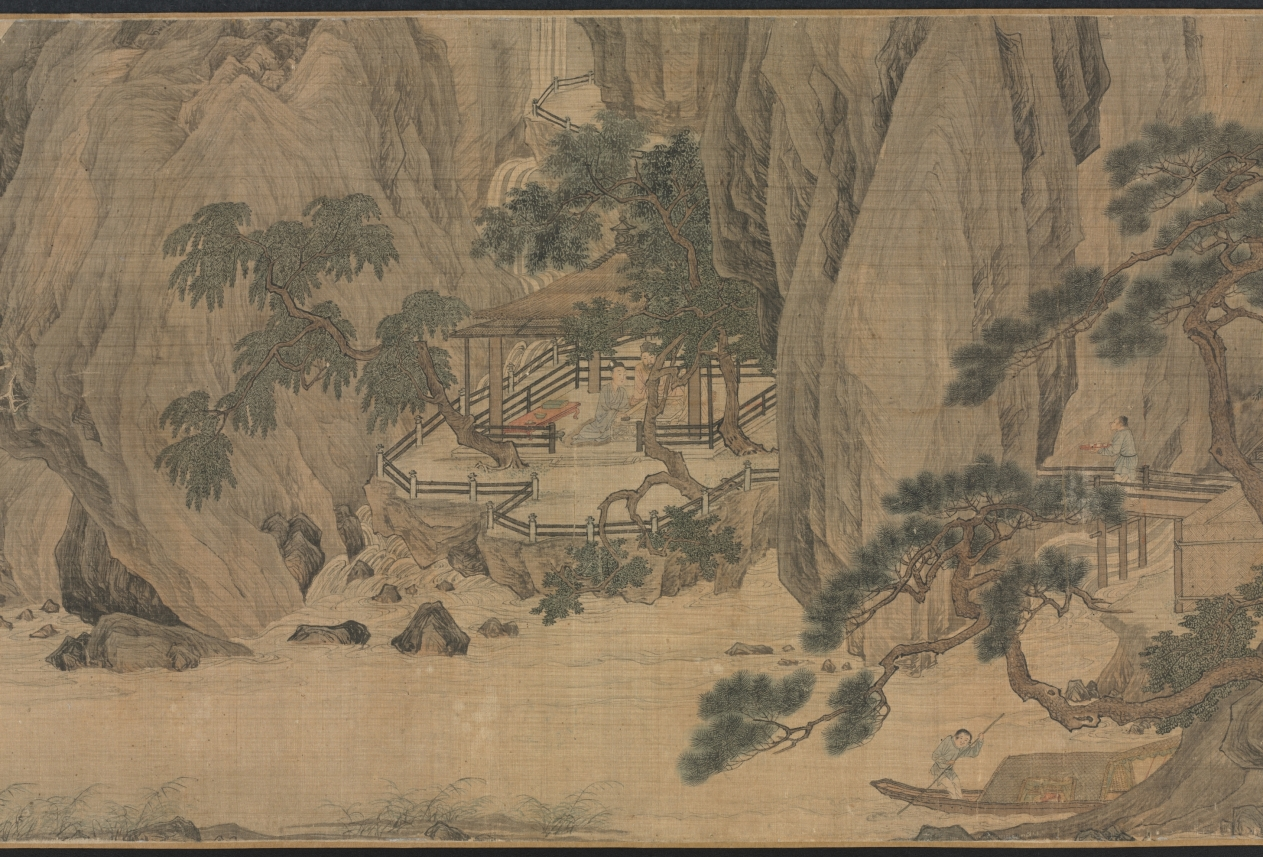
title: Scholar-Hermits in the Autumn Mountains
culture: China, Ming dynasty (1368–1644)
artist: Tang Yin (Chinese, 1470–1523)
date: 1500–1510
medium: handscroll, ink and light color on silk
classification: Painting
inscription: Artist's signature and 2 seals at end of scroll: Tang Yin [seals] T'ang Po-hu; T'ang Tzu'wei t'u-shu.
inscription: Title on frontispiece by Li Cho-kung (dates unknown).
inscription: 1 colophon and 11 additional seals: 1 colophon dated 1915 of Wu Tso-hsi (19th-20th c.); 2 seals of Gao Qifeng 高奇峰 (1889–1933); 5 seals of C. C. Wang 王季遷 (1907–2003); 4 seals unidentified.